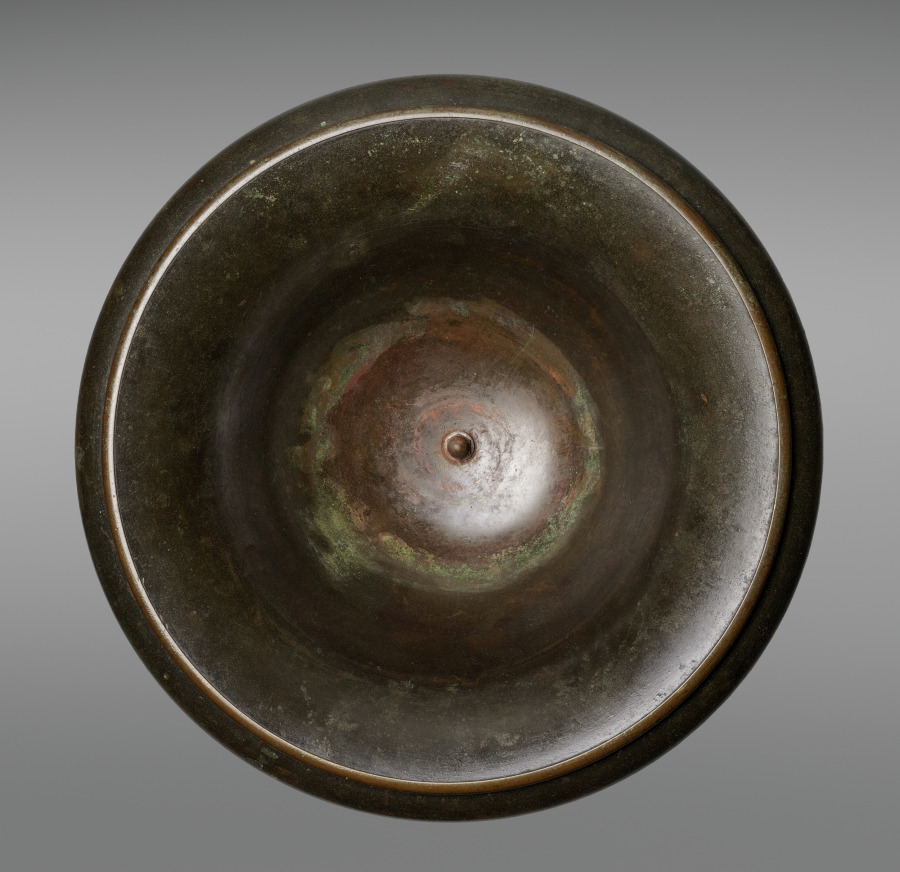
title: Vase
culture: France, late 18th-early 19th Century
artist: attributed to Pierre Philippe Thomire (French, 1751–1843)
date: c. 1800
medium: bronze, partially gilt, marble base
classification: Metalwork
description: In 1798, a large quantity of French furnishings was acquired for the Michael Palace in St. Petersburg, Russia. Some of these pieces survive in museums like the Hermitage Museum in St. Petersburg. This institution recently staged an exhibition of such French pieces by and attributed to Thomire. Among the objects shown was a bronze vase virtually identical in design to this piece. The body of this vase is decorated with two small reliefs showing male and female centaurs with putti riding on their backs. These reliefs also occur on silver wine coolers produced by the Odiot firm, a major Parisian silversmith under Napoleon's empire. The Odiot firm still owns models of these reliefs that, according to tradition, had been given to Jean-Baptiste Claude Odiot by Thomire.